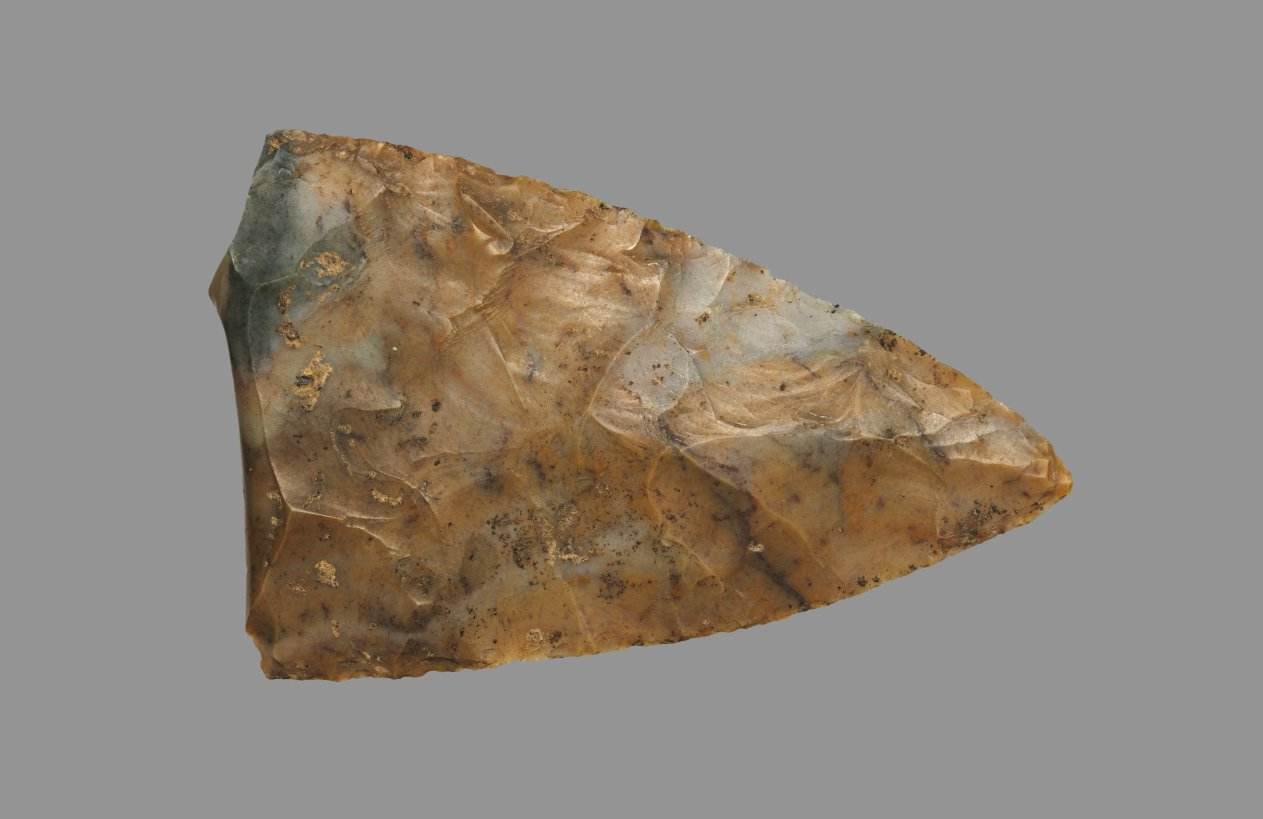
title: Sickle Blade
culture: Egypt, Middle Kingdom (2040–1648 BCE), Dynasty 12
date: 1980–1801 BCE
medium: flint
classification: Implements